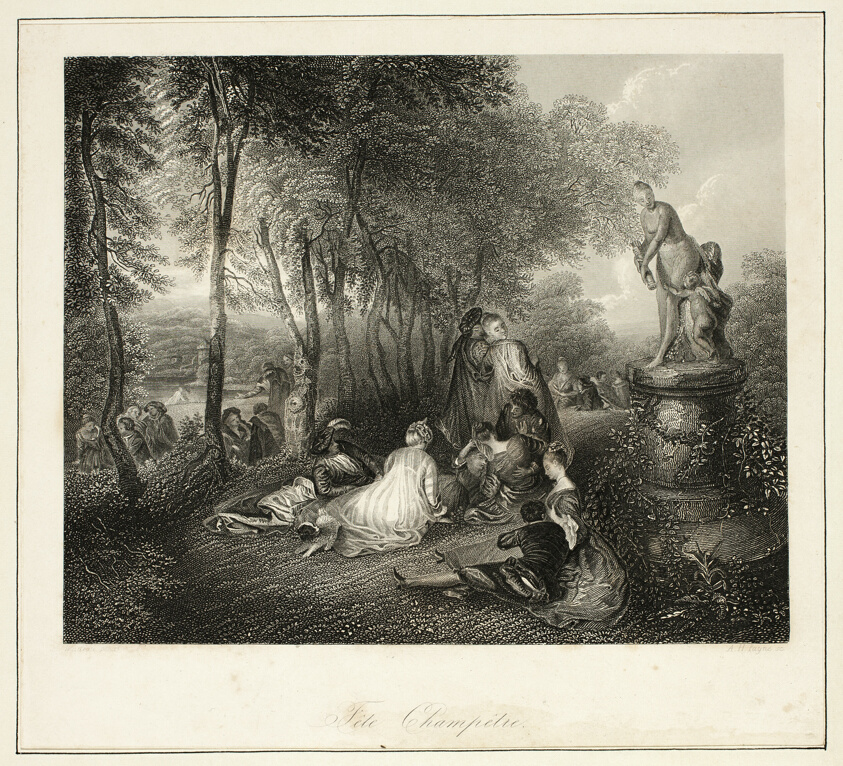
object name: Print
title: Fête Champêtre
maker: Albert Henry Payne (English, 1812-1902); after Jean Antoine Watteau (French, 1684-1721)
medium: Engraving in black on paper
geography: England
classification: engraving; print; prints and drawing